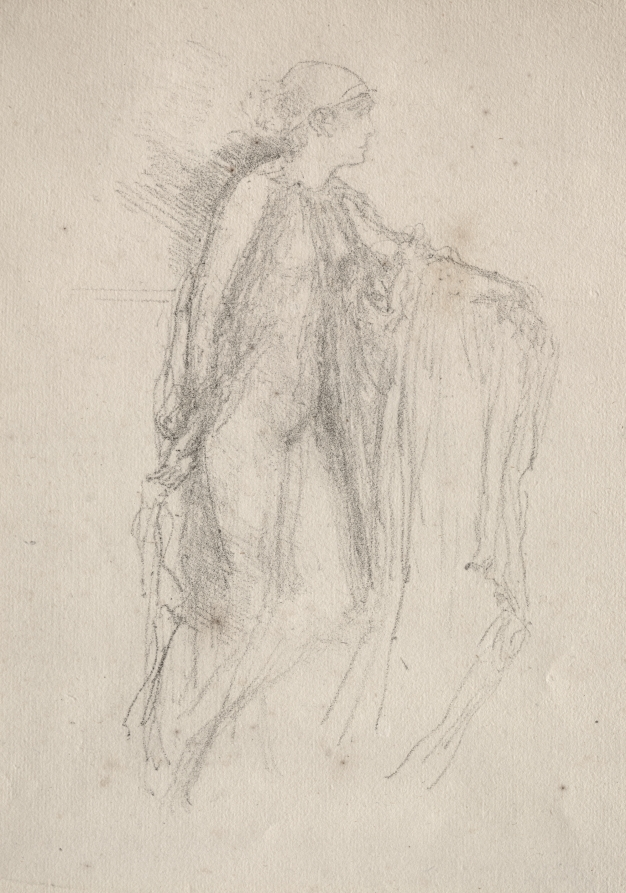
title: The Cap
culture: America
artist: James McNeill Whistler (American, 1834–1903)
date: 1893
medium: lithograph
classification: Print